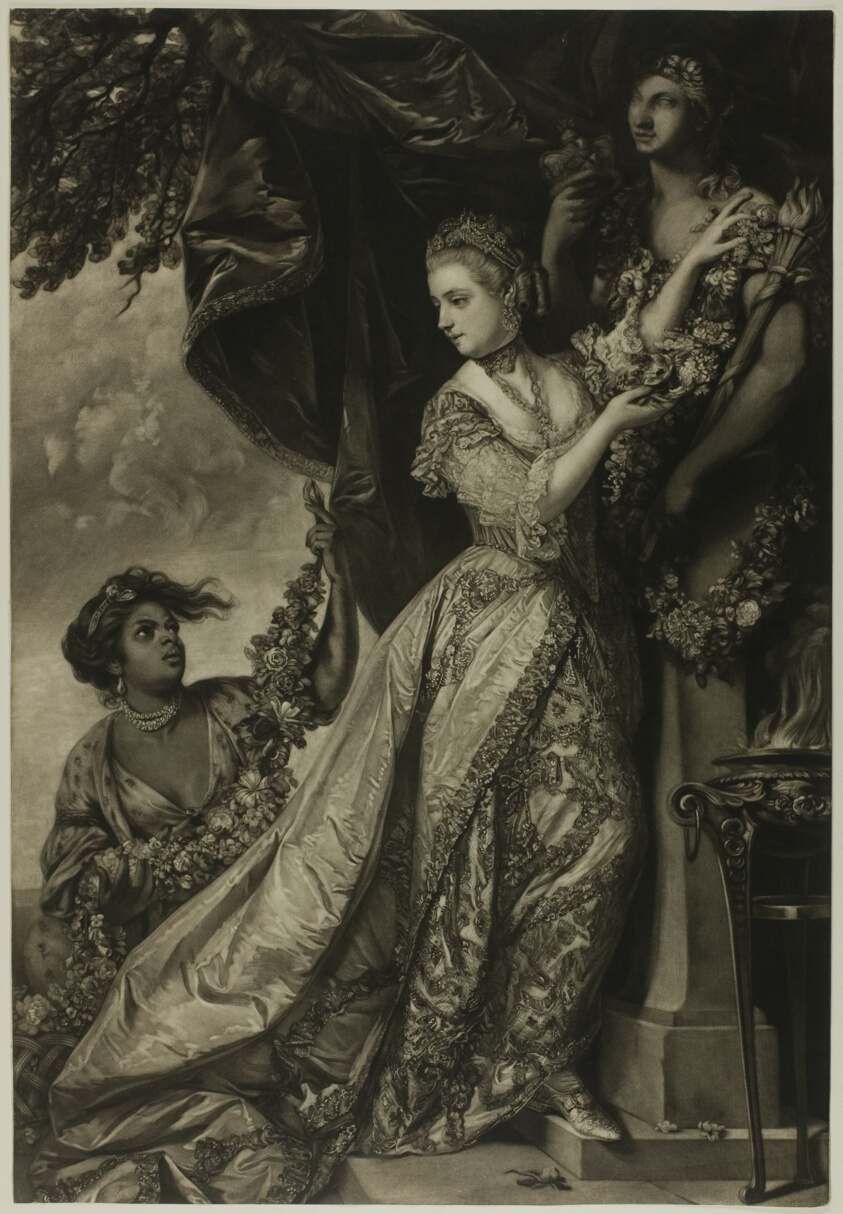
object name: Print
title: Lady Elizabeth Keppel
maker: Edward Fisher (Irish, 1730-1785); after Sir Joshua Reynolds (English, 1723-1792)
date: c. 1760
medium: Mezzotint on paper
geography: Ireland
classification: mezzotint; print; prints and drawing